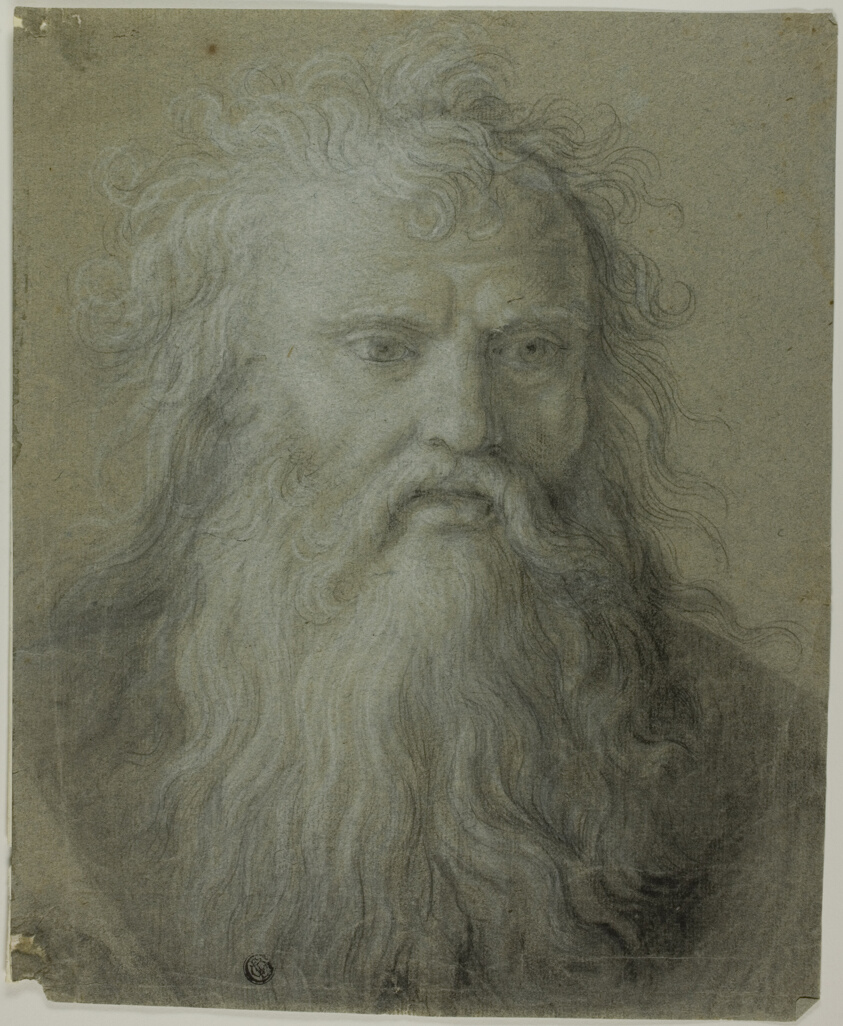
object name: Drawing and Watercolor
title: Bust of Old Bearded Man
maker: Style of or after Antonio Cavallucci; Italian, 1752-1795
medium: Black and white chalk, on blue laid paper (discolored to brown)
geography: Italy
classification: drawings (visual works); chalk; prints and drawing